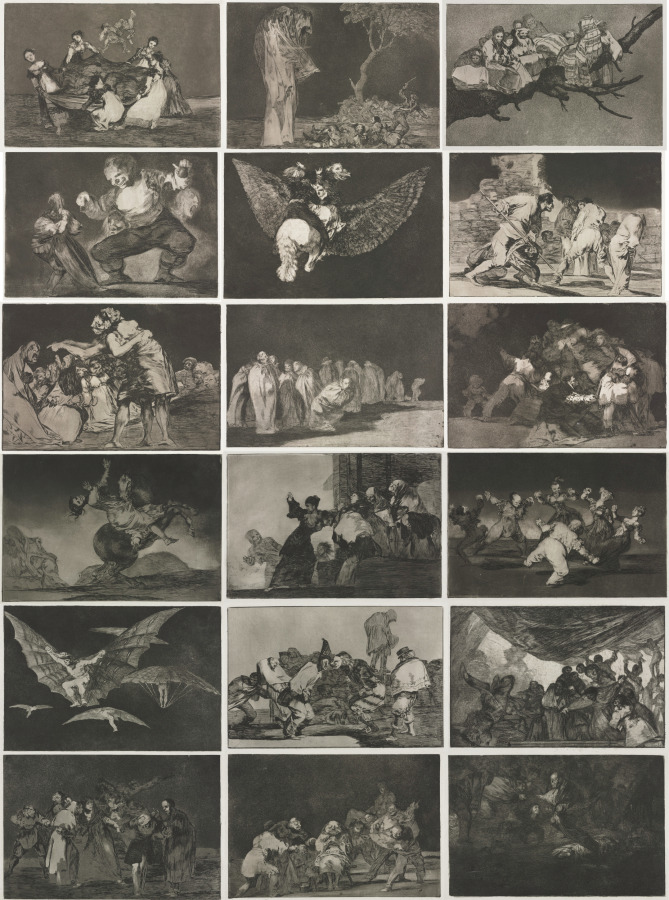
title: The Proverbs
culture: Spain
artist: Francisco de Goya (Spanish, 1746–1828)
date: 1864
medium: etching and aquatint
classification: Print